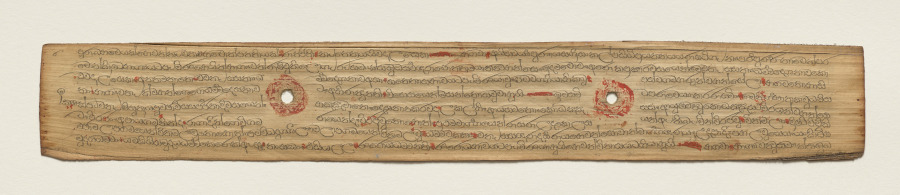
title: Leaf from a Buddhist Manuscript (recto)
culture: Sri Lanka, Singhalese, Late 17th century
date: c. 1700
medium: fiber paper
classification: Manuscript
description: Palm leaf material is still used for manuscripts in Sri Lanka. The palm leaves are prepared first by boiling them, drying them in the sun, and then rubbing them with oils. Scribes then use a metal stylus to incise the text. Then charcoal powder is wiped across the pages, filling in only the inscribed lines.